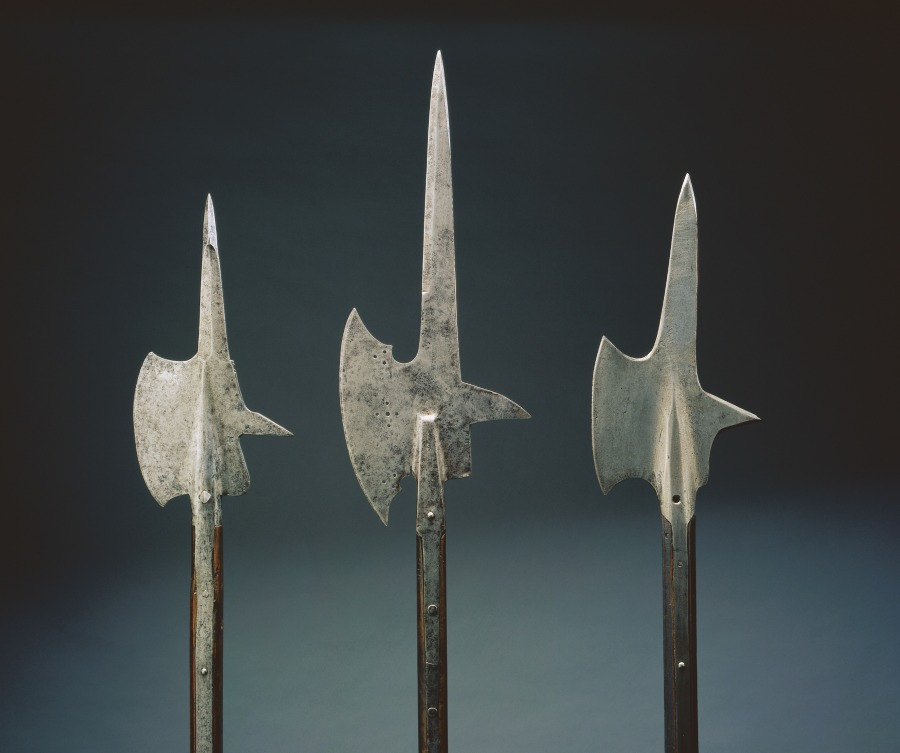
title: Halberd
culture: Switzerland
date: 1600s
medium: steel; new rectangular wood haft with planed corners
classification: Arms and Armor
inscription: IP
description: The halberd was a staff weapon favored by European infantries (foot soldiers) of the 1400s and 1500s for its versatility and deadly effect. The word halberd comes from the German words Halm (staff) and Barte (axe). The halberd is, in fact, an axe that served multiple functions: the axe blade was used for hacking, the spike for thrusting, and the beak for piercing plate armor or for pulling a knight from his saddle. The halberd was used by shock troops (those who lead an attack) and by Swiss and German mercenaries. After about 1550, the halberd gradually became less functional. Its large blade provided space for coats of arms and insignia. By the late 1500s, the parade halberd had become a ceremonial weapon for palace guards.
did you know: The earliest known mention of the halberd is believed to be by the Swiss poet Konrad von Würzburg (d. 1287) who wrote about them in his History of the Trojan War.